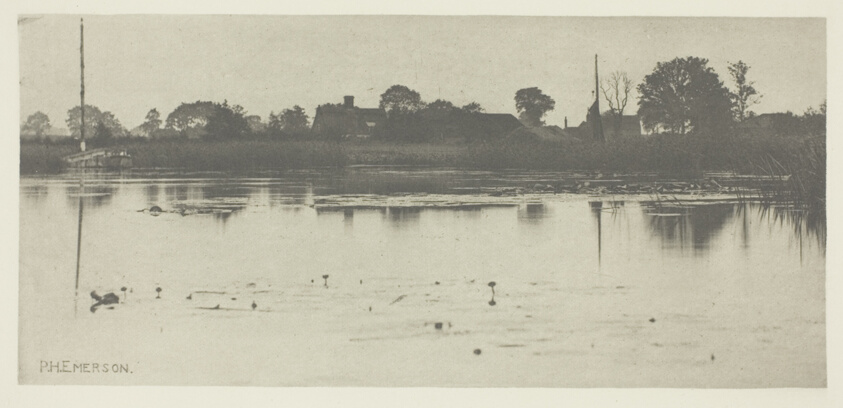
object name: Photograph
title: The Fringe of the Mere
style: 19th century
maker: Peter Henry Emerson (English, born Cuba, 1856–1936)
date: c. 1883/87, printed 1888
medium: Photogravure, pl. X from the album "Pictures of East Anglian Life" (1888)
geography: England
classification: photogravure; photomechanical process; photography; photograph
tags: Collected by Hugh Edwards, Pictures of East Anglian Life, Seat of War in the Crimea